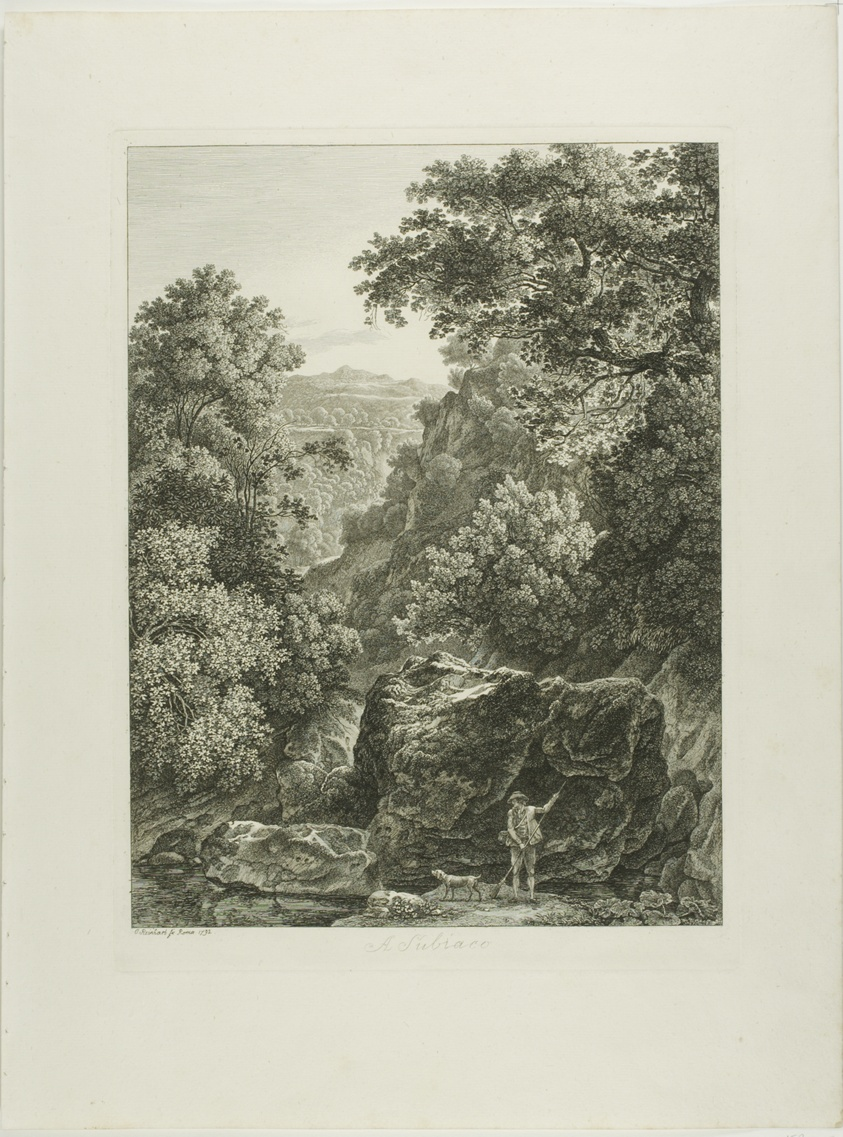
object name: Print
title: A Subiaco, from Malerisch Radierte Prospekte aus Italien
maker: Johann Christian Reinhart (German, 1761-1847)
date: 1792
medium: Etching on ivory laid paper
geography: Germany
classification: etching; prints and drawing; print